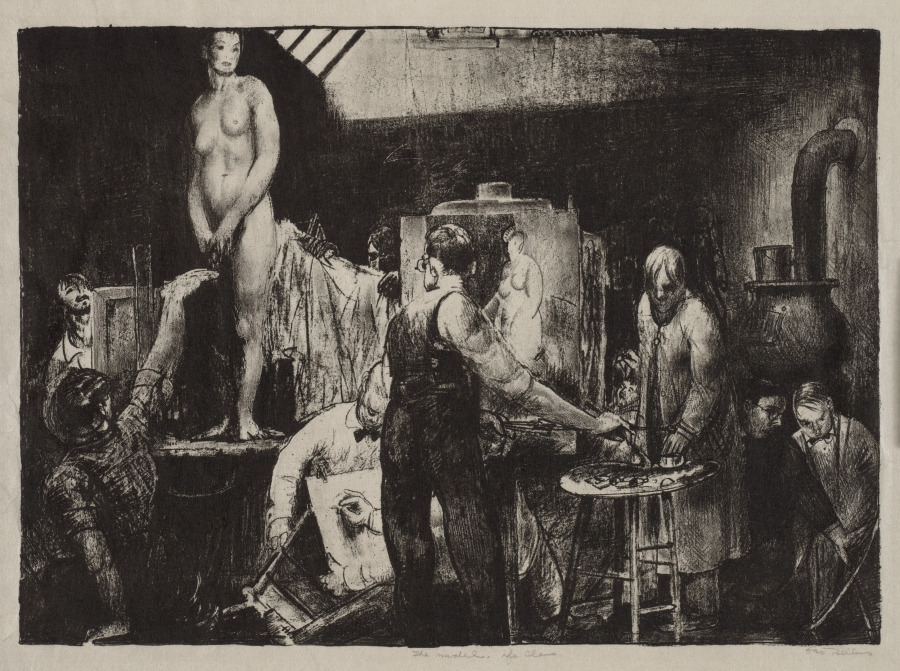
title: "The Life Class"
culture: America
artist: George Bellows (American, 1882–1925)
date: 1916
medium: lithograph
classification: Print